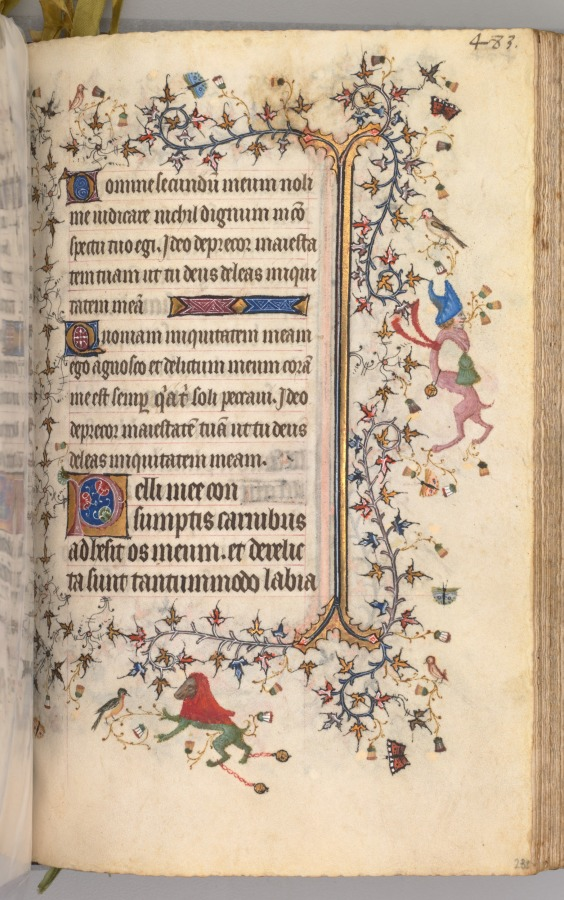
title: Hours of Charles the Noble, King of Navarre (1361-1425): fol. 236r, Text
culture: France, Paris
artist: Master of the Brussels Initials and Associates (French)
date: c. 1405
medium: ink, tempera, and gold on vellum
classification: Bound Volume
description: This precious volume was obviously highly prized by its owner, the French-born King of Navarre, who had his coat of arms painted on no less than twenty folios. Rather than directly commissioning this manuscript from a specific workshop, it seems that Charles the Noble acquired his book of hours -- perhaps ready-made for the luxury market -- while on a trip to Paris in 1404-05. A collaborative effort, six painting styles are evidenced within the pages of this codex, those of two Italians, two Frenchmen, and two Netherlanders. The painter who was responsible for the planning and decoration of the book, and who produced seventeen of the large miniatures, was a Bolognese artist known as the Master of the Brussels Initials. His principal assistant, responsible for most of the borders, was a Florentine who signed his name "Zecho" da Firenze on folio 208 verso.